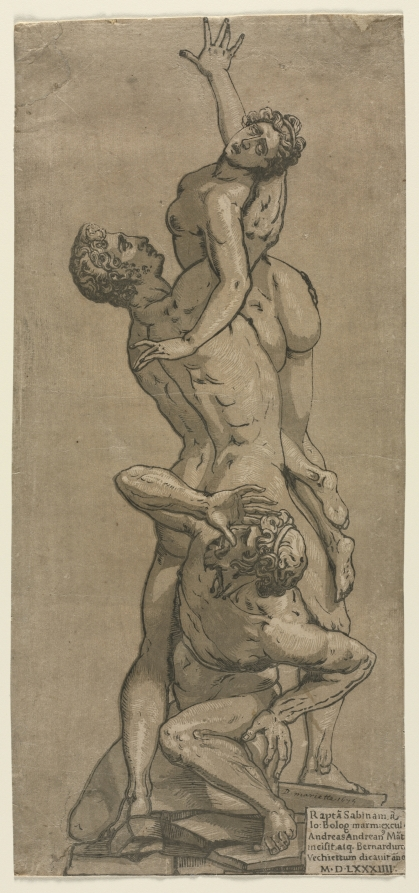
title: The Abduction of a Sabine Woman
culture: Italy, 16th century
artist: Andrea Andreani (Italian, about 1558–1610)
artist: after Giambologna (Flemish, active Italy, 1529–1608)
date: 1584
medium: chiaroscuro woodcut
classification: Print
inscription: In black ink on the rock on the right: "P. marietta 1674" Inscribed lower right: "Rapta (m) Sabinam a / Io: Bolog. Marm: excul./ Andreas Andrean(us) Ma(n)t:/ incisit.atq (ue). Bernard/ Vechiett dicavit an/)no/ M.D.LXXXIII"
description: A pinnacle of sculpture in the generation after Michelangelo was Giambologna’s Abduction of the Sabine Women, depicted here in a contemporaneous print by Andrea Andreani. Giambologna created a twisting harmony of three forms that capture the narrative of a Roman male abducting a Sabine woman and vanquishing a Sabine male below. Giambologna’s sculpture was installed in Florence in the public piazza near Michelangelo’s David.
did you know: The Abduction of a Sabine Woman is the first attempt in the chiaroscuro technique by Andrea Andreani, as well as the first chiaroscuro ever to depict a work of sculpture.